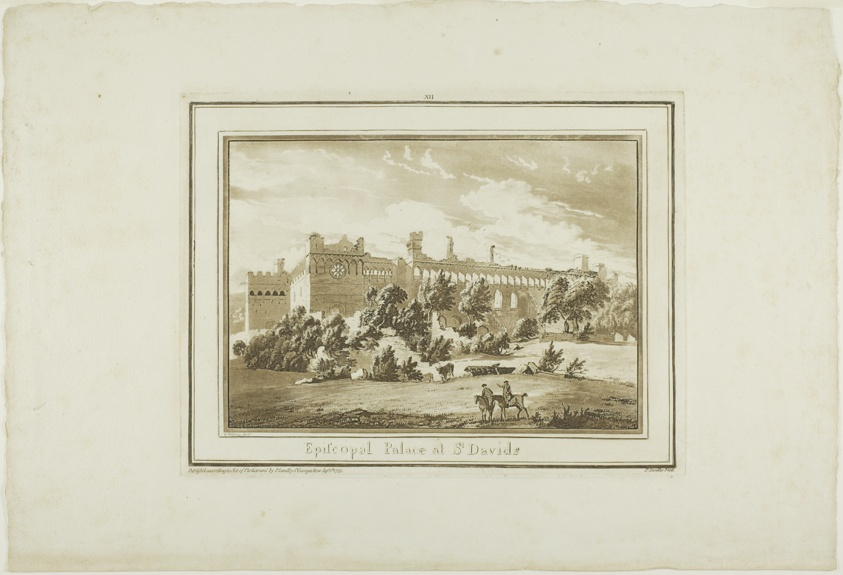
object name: Print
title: Episcopal Palace at St. Davids, plate twelve from Twelve Views in South Wales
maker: Paul Sandby (English, 1731-1809); after Luttrell Wynne (English, 1738-1814)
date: 1775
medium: Aquatint with etching on ivory laid paper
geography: England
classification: aquatint; print; prints and drawing